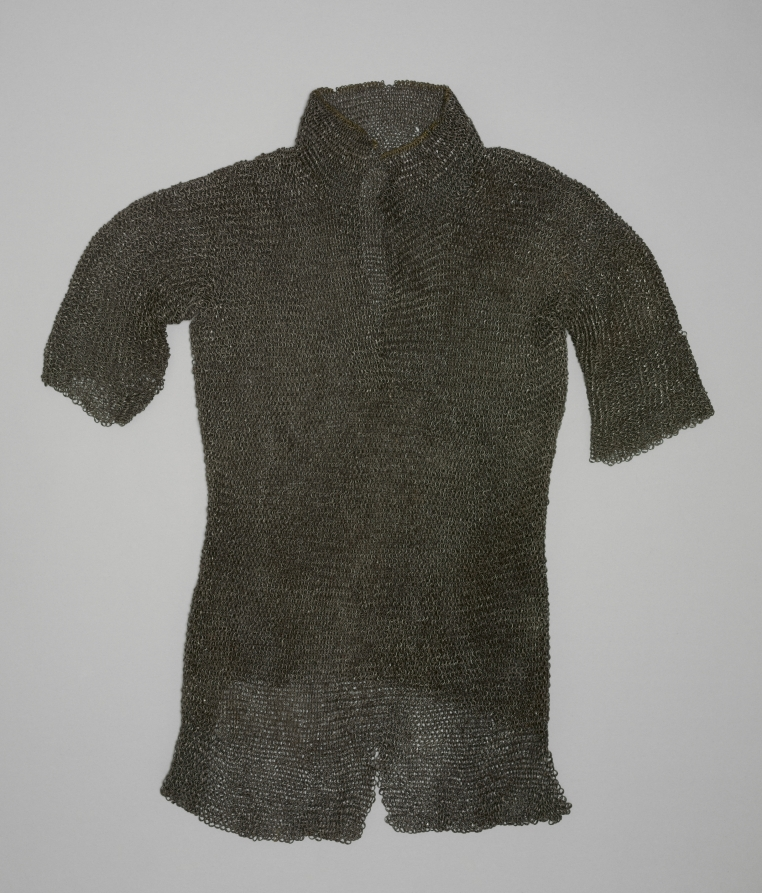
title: Hauberk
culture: European, 15th century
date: 1400s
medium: riveted steel rings; close woven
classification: Arms and Armor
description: By the early 1400s the hauberk was being worn as an accessory to supplement full or partial plate armor. It offered a secondary level of protection for areas not fully covered by plate armor, such as the armpit and groin. The making of chainmail involved the linking of thousands of small rings of steel.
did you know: Mail provided excellent defense against the sword cut, though only limited defense against crushing blows from weapons like the mace or the battle axe.